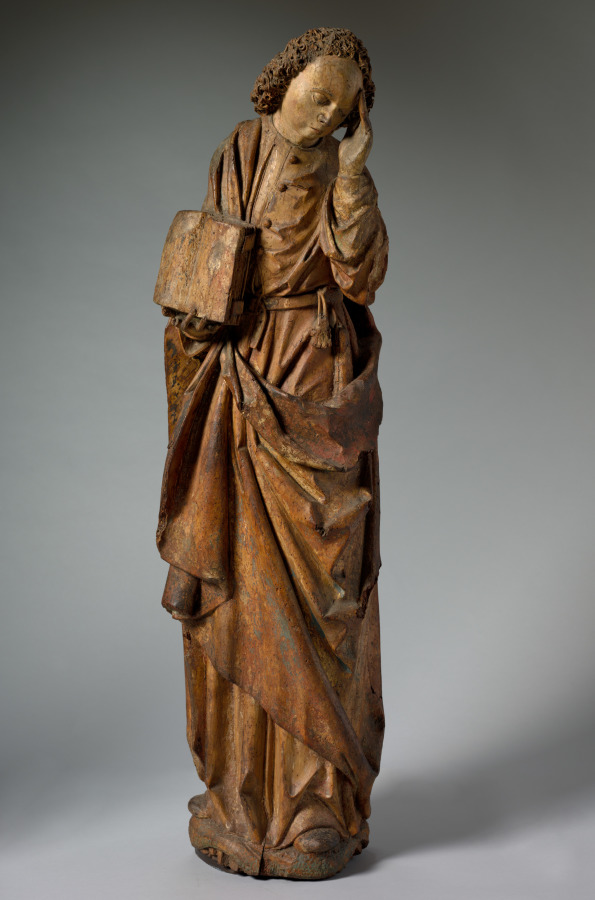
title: Saint John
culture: France, 15th century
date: 1450–1499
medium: wood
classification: Sculpture